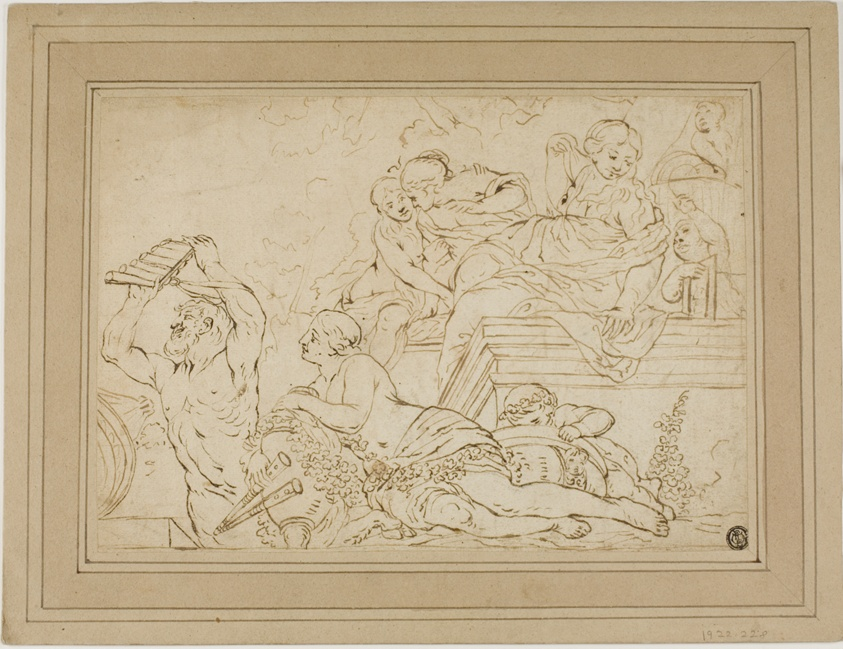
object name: Drawing and Watercolor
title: Scene with Nymphs and Satyr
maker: Attributed to Nicolas Pierre Loir; French, 1624-1679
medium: Pen, brown and black ink over touches of black chalk on cream laid paper, laid down on cream card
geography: France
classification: pen and ink drawings; drawings (visual works); prints and drawing